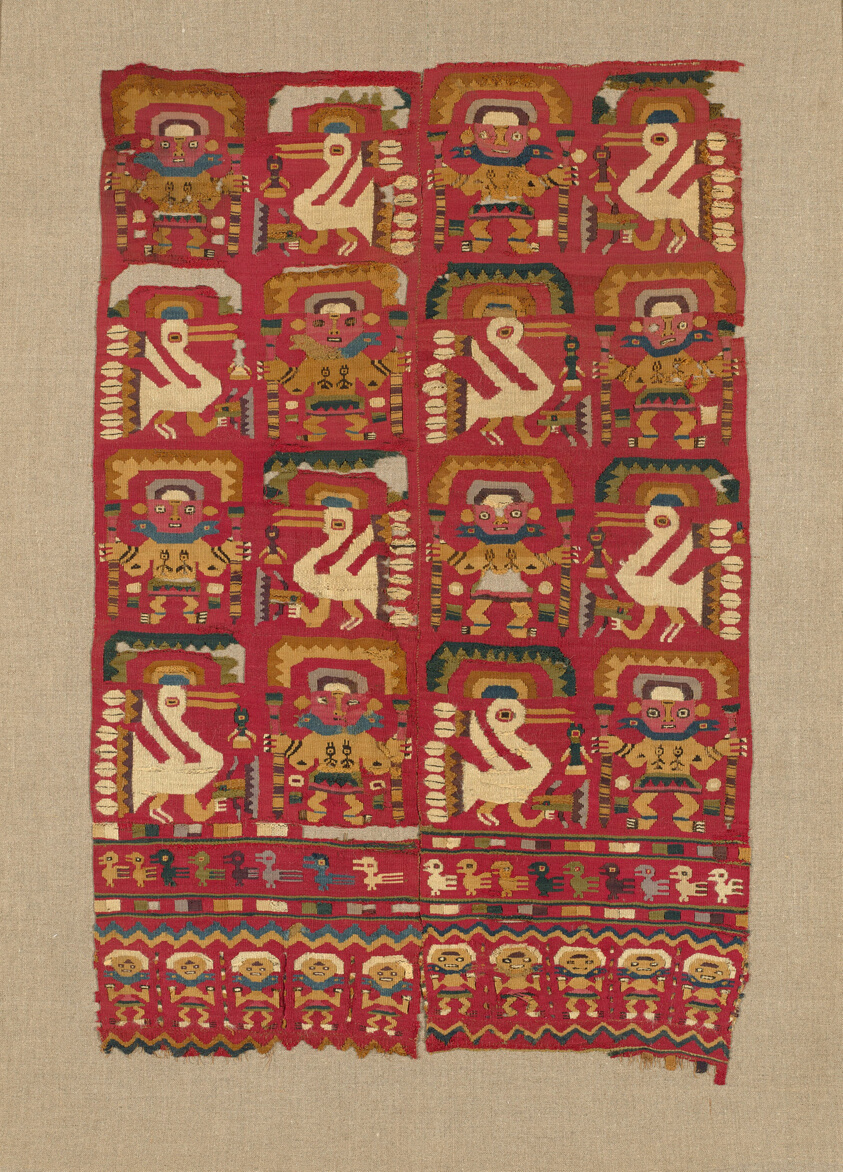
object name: Textile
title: Panel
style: lambayeque, Pre-Columbian, middle horizon, americas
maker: Lambayeque (North coast, Peru)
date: 1000/1476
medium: Cotton and wool (camelid), slit tapestry weave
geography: Peru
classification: weaving; textile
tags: birds, animals, fish, human, anthropomorphic figure, staffs, headdresses, geometric motif, super/natural